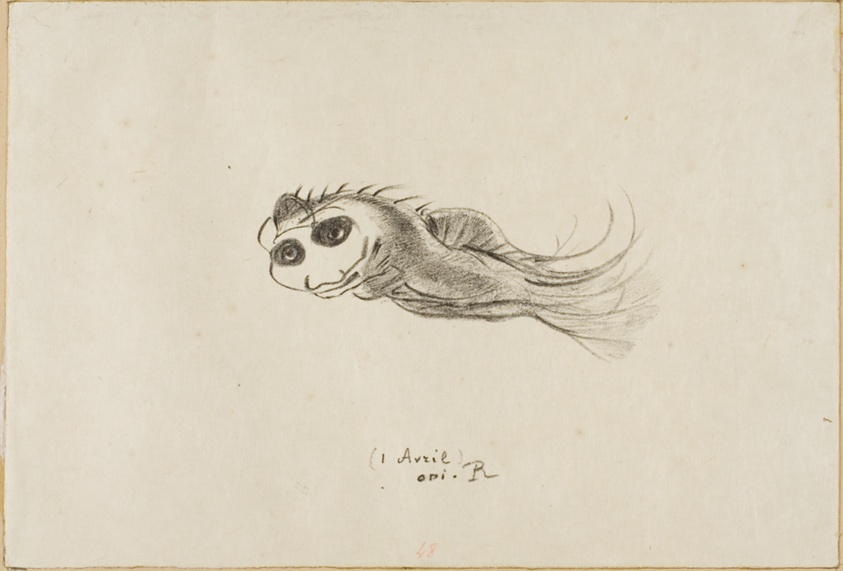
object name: Print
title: Menu of a Dinner for French Lithographers, April 1, 1887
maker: Odilon Redon (French, 1840-1916)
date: Mar. 25, 1886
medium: Lithograph in black on ivory Japanese paper, mounted on tan wove paper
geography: France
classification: lithograph; print; prints and drawing; paper